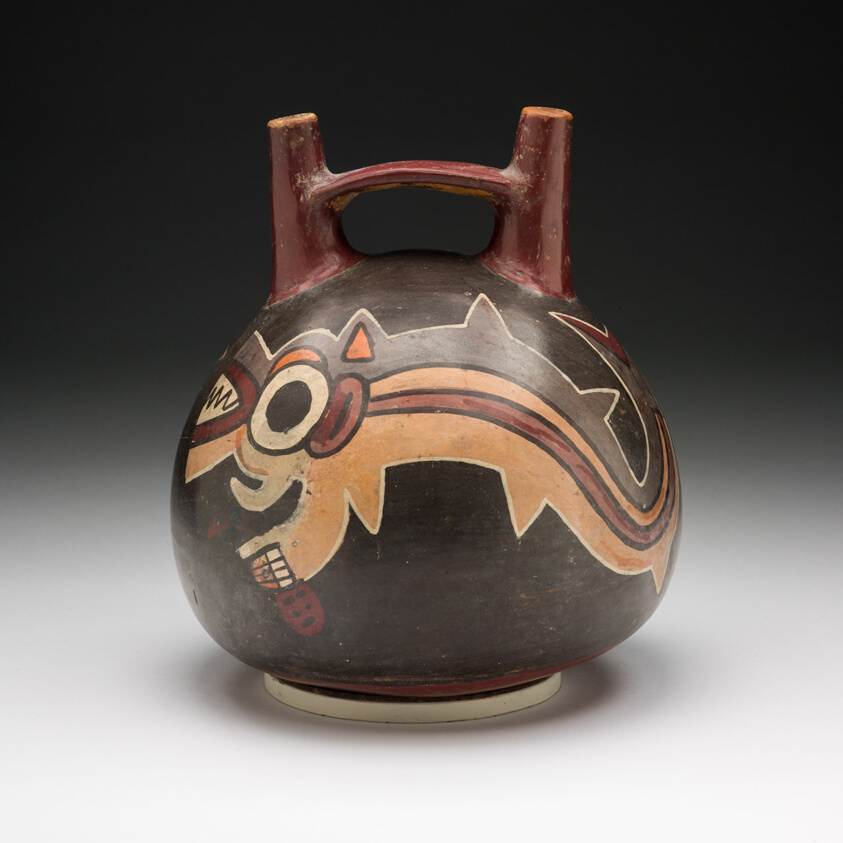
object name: Vessel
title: Vessel with Killer Whales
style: nazca, early intermediate period, Pre-Columbian, americas, andes, Arts of the Americas, andean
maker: Nazca; South coast, Peru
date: 100 BCE–500 CE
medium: Ceramic and pigment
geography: Peruvian South Coast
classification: earthenware; art of the americas; ceramics; vessel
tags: whale, animals, sacrifice, anthropomorphic figure, fish